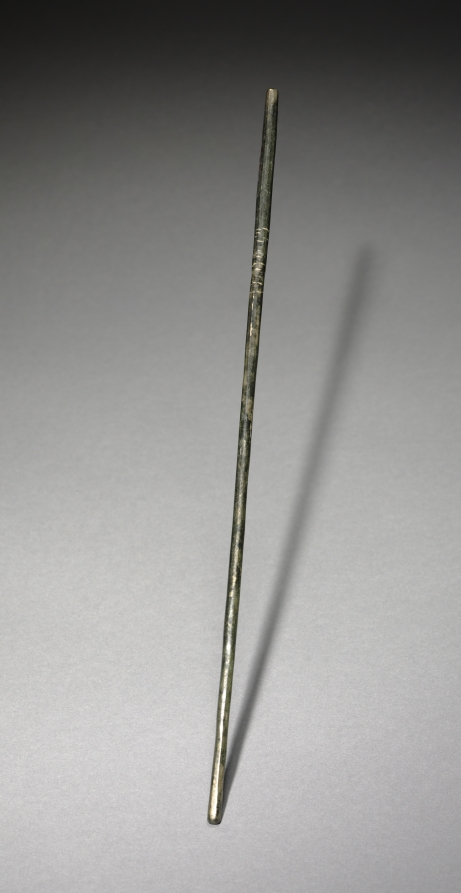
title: Chopstick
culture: Korea, Goryeo dynasty (918–1392)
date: 918–1392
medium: bronze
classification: Metalwork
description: In Korea, chopsticks made of metal such as brass, silver, and gold were excavated from ancient tombs and ruins dated to the 6th century at the earliest. Burial goods often include utilitarian objects such as table wares and utensils because the dead were believed to need them in the afterlife.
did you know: In contrast to the Chinese and Japanese, Koreans still prefer metal chopsticks (stainless steel and brass) to wooden ones.